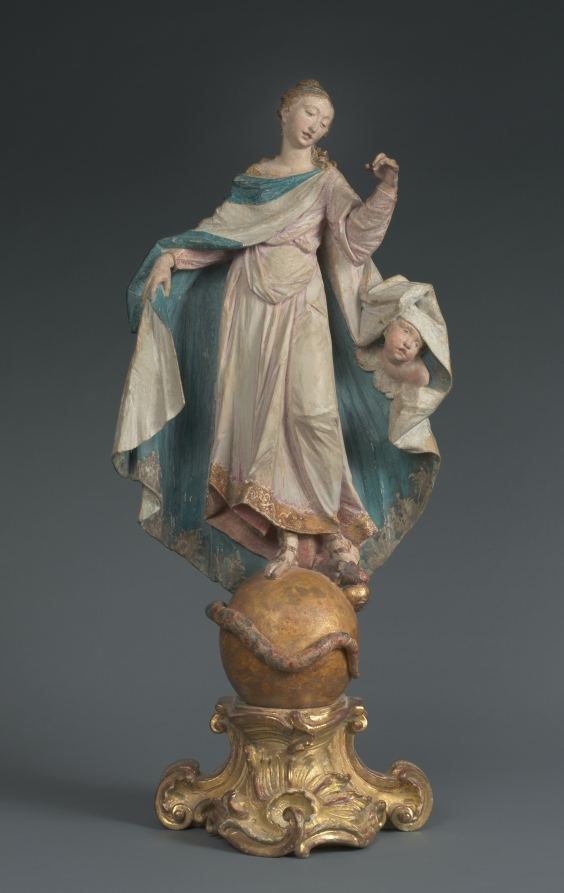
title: The Immaculate Conception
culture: Germany, Munich, 18th century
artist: Ignaz Günther (German, 1725–1775)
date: c. 1770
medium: painted and gilded wood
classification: Sculpture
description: The Christian doctrine of the Immaculate Conception maintains that the Virgin Mary was conceived free from sin, ready to be the pure vessel for Christ’s birth. Depicting such an abstract idea required specific imagery. The moon beneath the Virgin’s feet, for example, comes from the New Testament vision of Saint John the Evangelist (Revelation 12:1) of “a woman clothed with the sun, with the moon under her feet,” while the serpent upon which she treads symbolizes Christ’s triumph over original sin. With his characteristically delicate modeling, elongated proportions, and soft coloring, Ignaz Günther created an archetypal image of innocence on the cusp of womanhood.